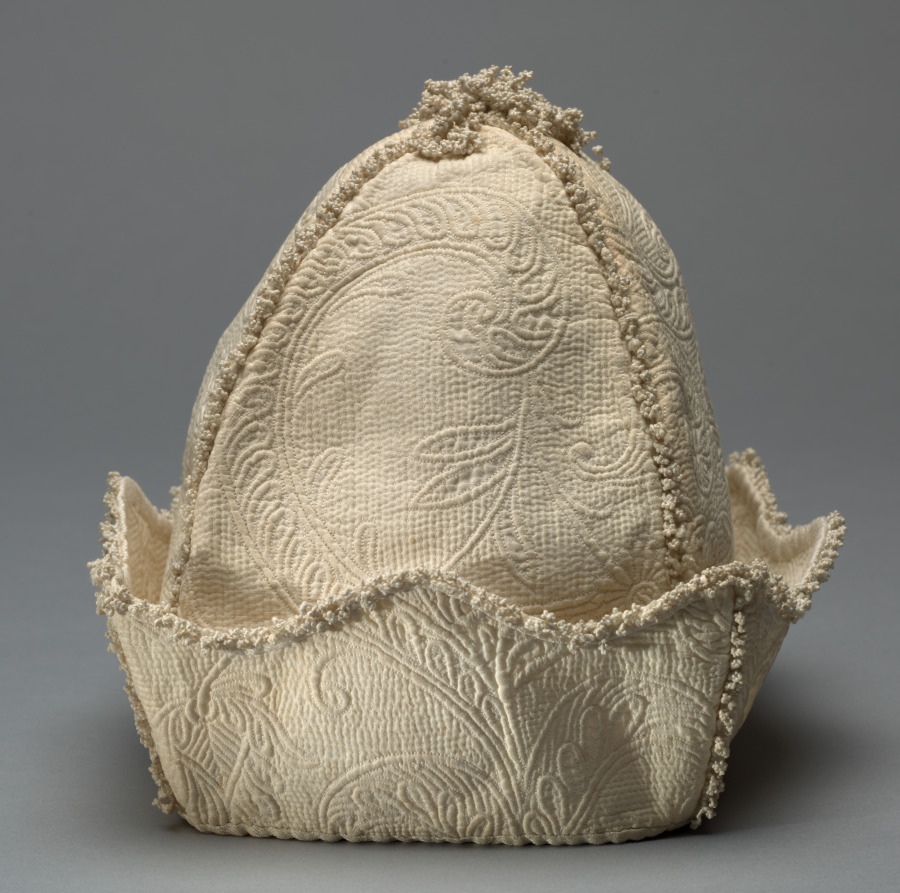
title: Man's Cap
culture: Denmark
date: 1600s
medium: linen with cotton design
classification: Garment